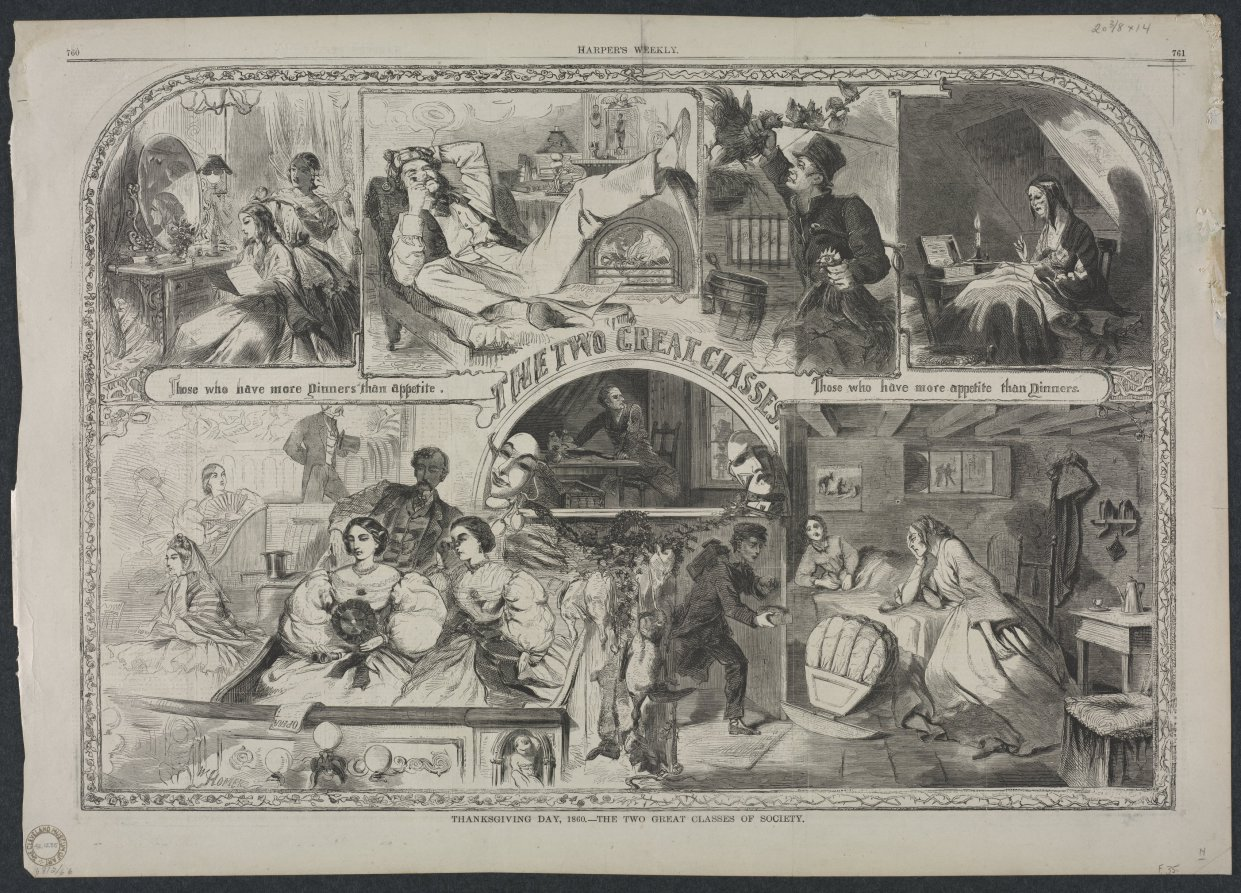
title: Thanksgiving Day, 1860 - The Two Great Classes of Society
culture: America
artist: Winslow Homer (American, 1836–1910)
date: 1860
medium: wood engraving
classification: Print